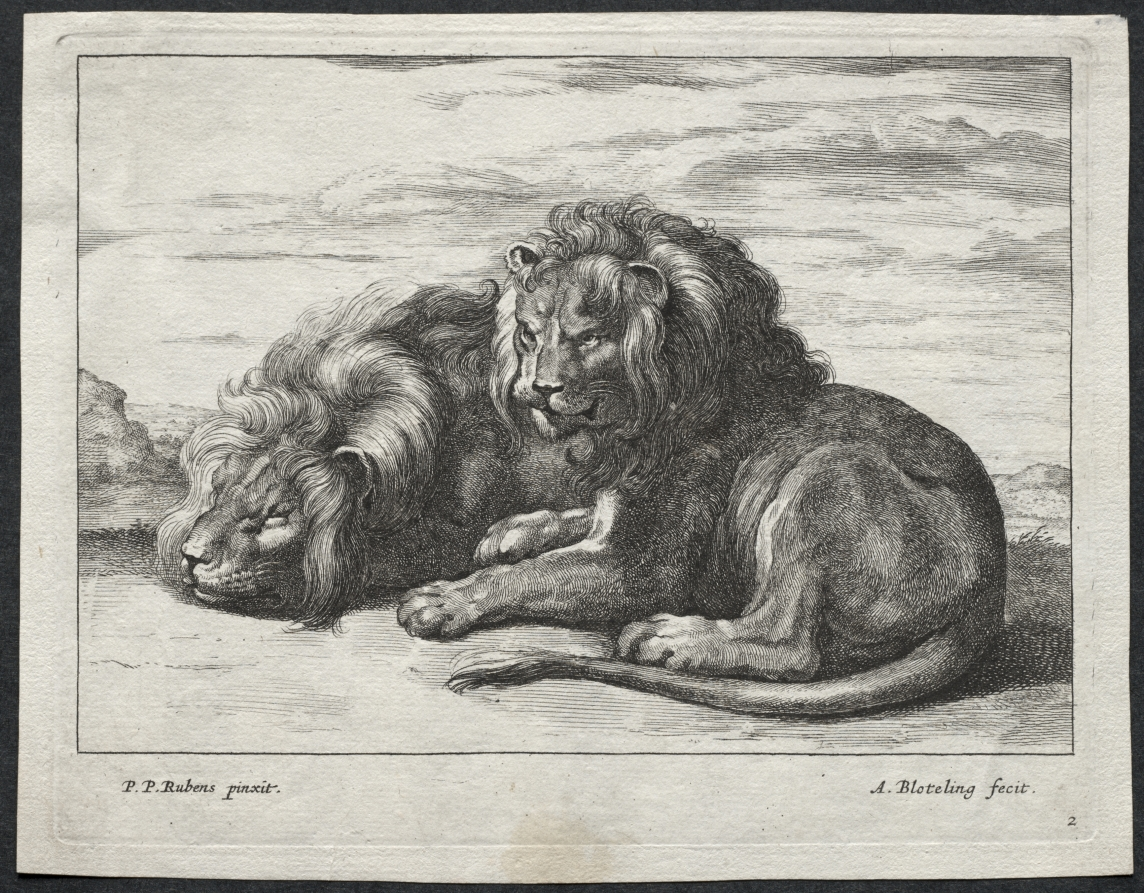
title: Various Lions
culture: Netherlands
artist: Abraham Blooteling (Dutch, 1640–1690)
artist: after Peter Paul Rubens (Flemish, 1577–1640)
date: 1655–90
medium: etching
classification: Print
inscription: Verso: indecipherable collector's stamp (faded due to cleaning)